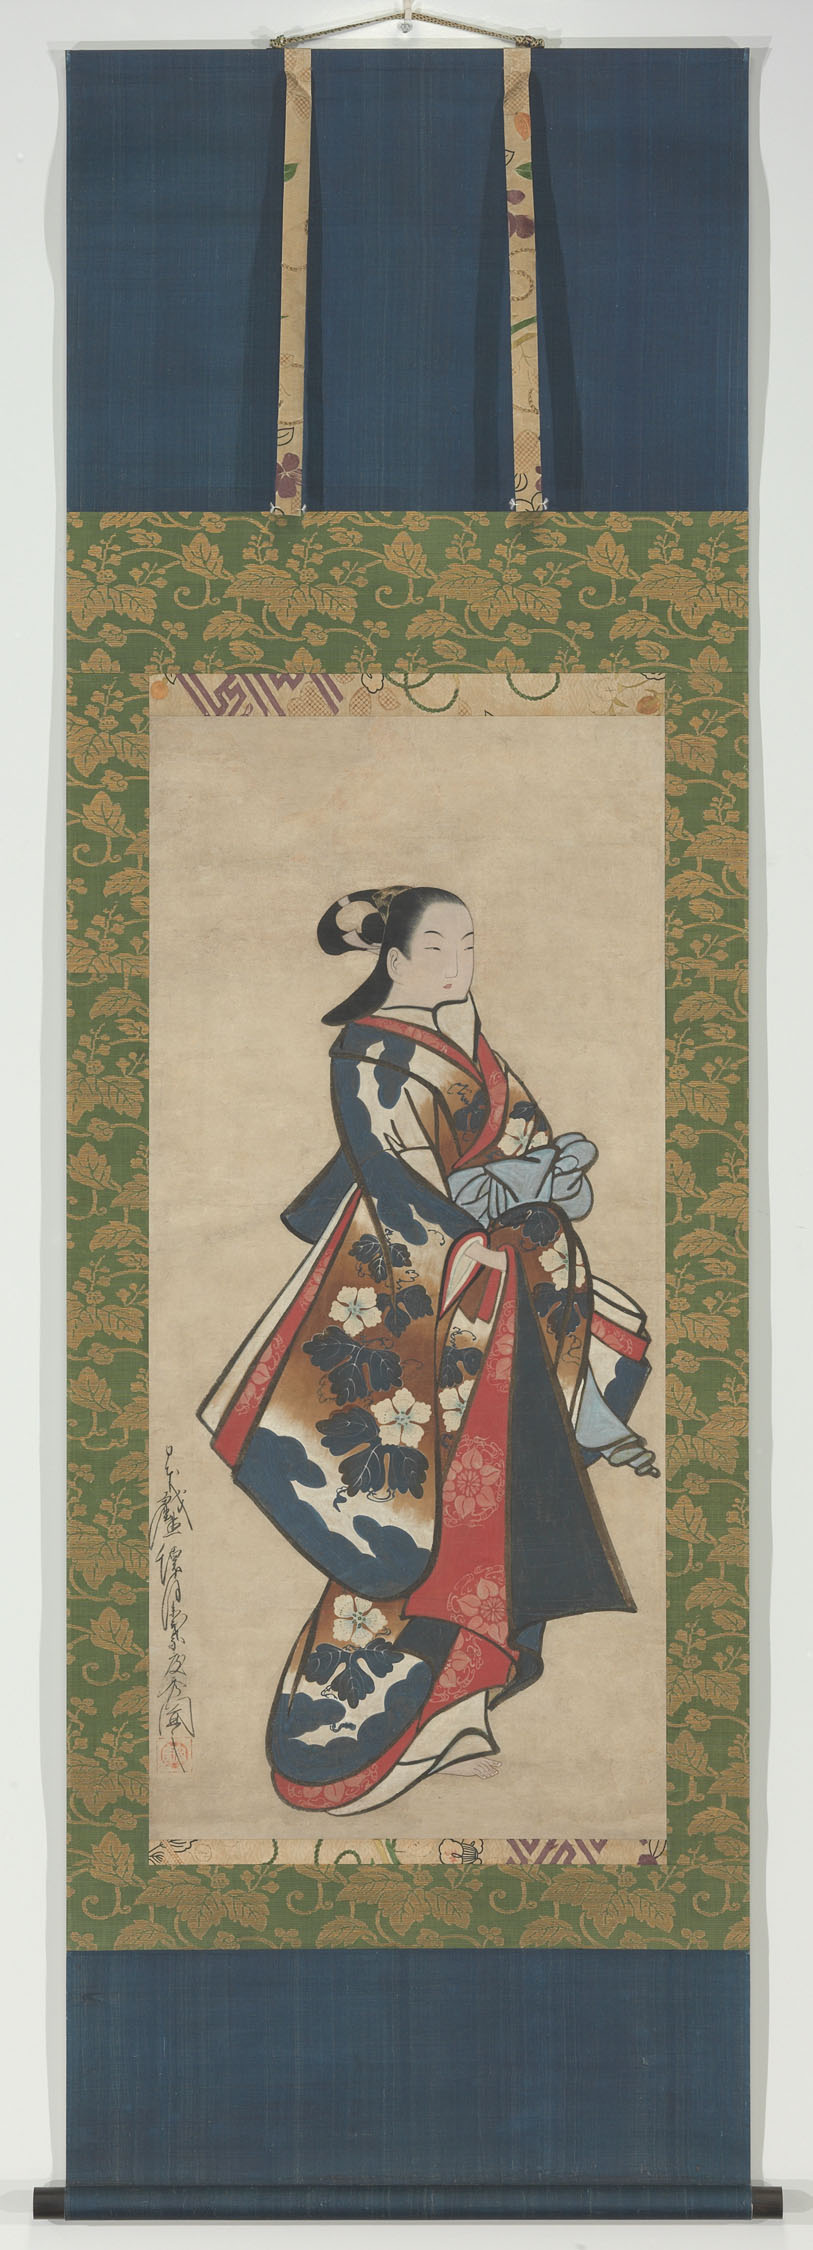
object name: Painting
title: Standing Beauty in Blue Kimono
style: Japanese (culture or style)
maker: Kaigetsudo Doshu (Japanese, active c. 1711-16)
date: c. 1711–16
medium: Hanging scroll; ink and color on paper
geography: Japan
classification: hanging scroll; painting